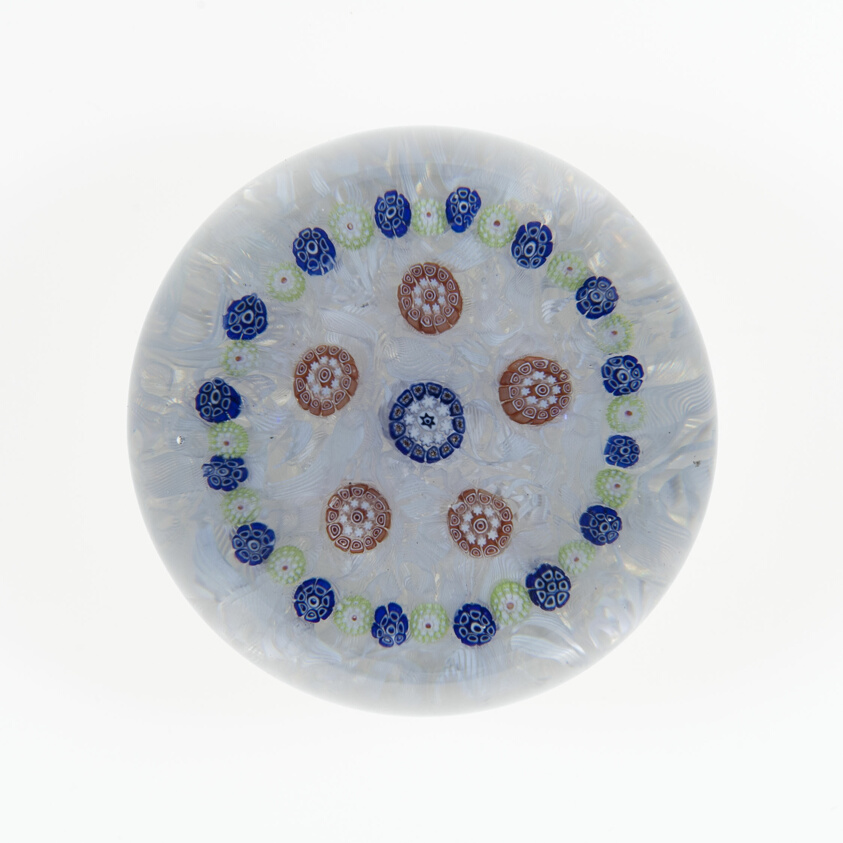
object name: Glass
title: Paperweight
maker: Saint-Louis Glassworks (Cristalleries de Saint-Louis); Lorraine, France, founded 1586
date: c. 1845–60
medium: Glass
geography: Saint-Louis-lès-Bitche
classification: paperweight; glass